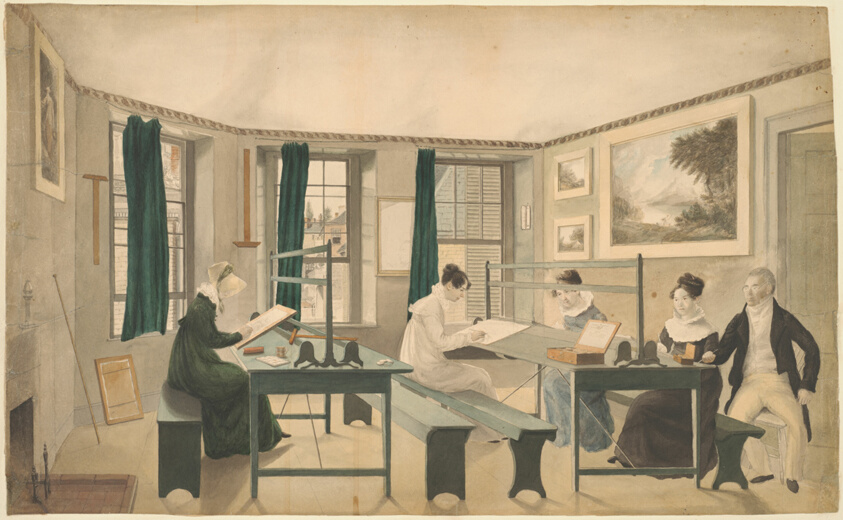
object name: Drawing and Watercolor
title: The Drawing Class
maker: Unknown Artist; American, 19th century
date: 1810/13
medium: Watercolor over graphite on cream wove paper, laid down on cream board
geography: United States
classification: watercolor; drawings (visual works); prints and drawing